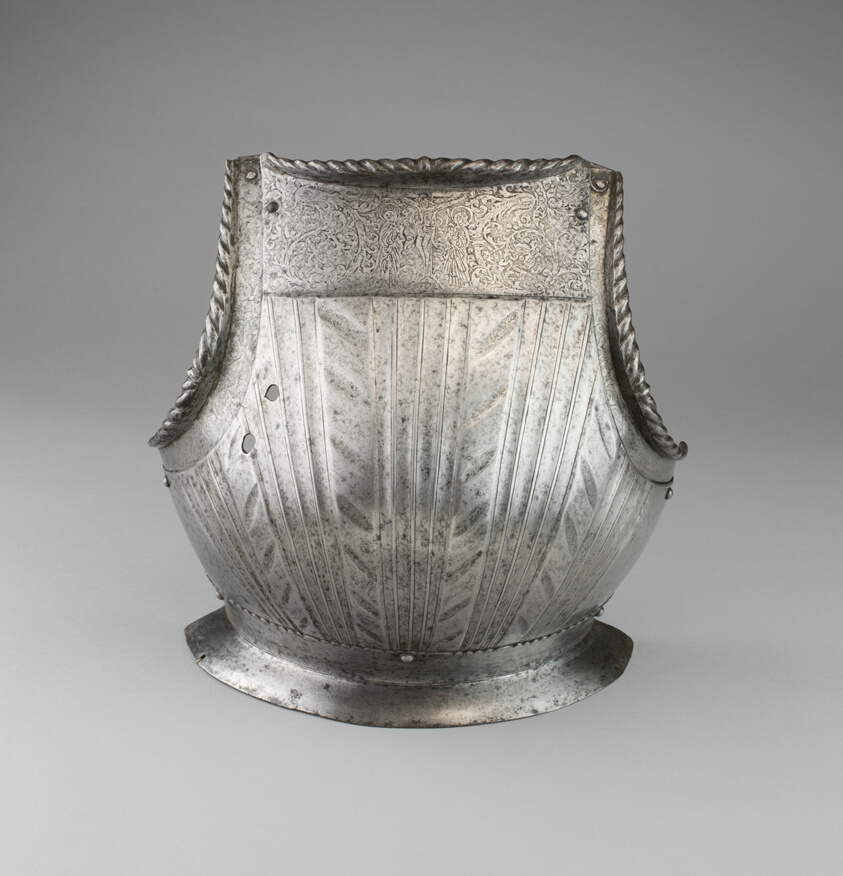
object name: Armor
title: Breastplate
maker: South German or Austrian (Innsbruck)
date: c. 1520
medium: Steel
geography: Innsbruck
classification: suit-element; armor; arms and armor